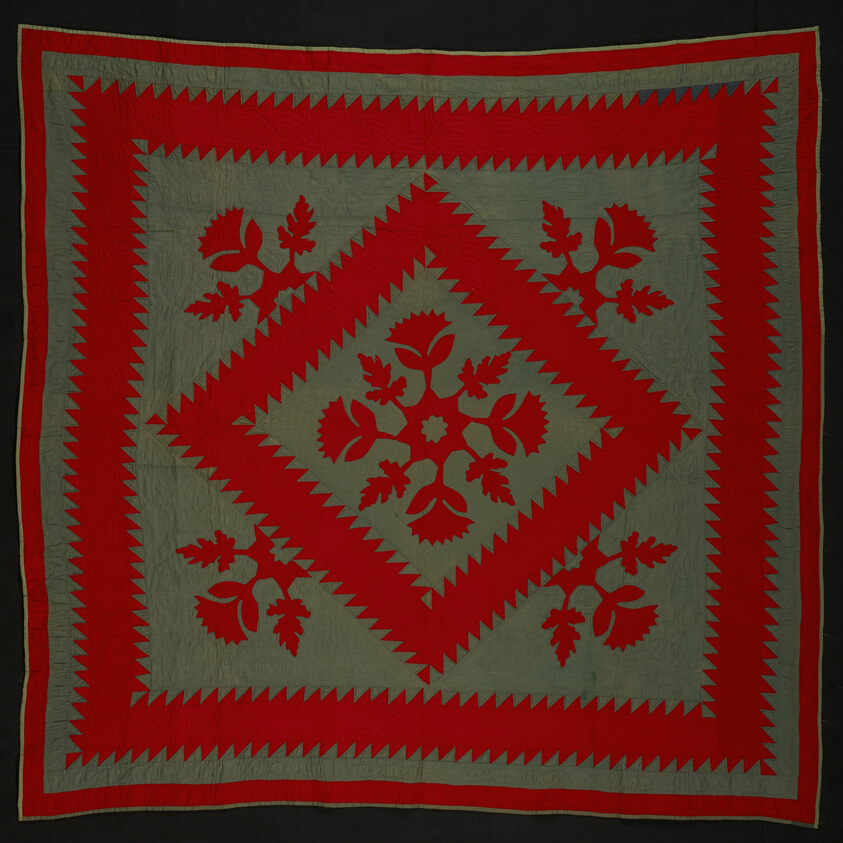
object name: Textile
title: Bedcover ("Sawtooth" or "Jagged Square" Quilt)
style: amish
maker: Pennsylvania Dutch; United States, Pennsylvania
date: c. 1890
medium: Cotton, plain weaves; pieced; appliquéd; quilted; backed with cotton, plain weave; printed; edged with cotton plain weave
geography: United States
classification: needlework - quilt; textile